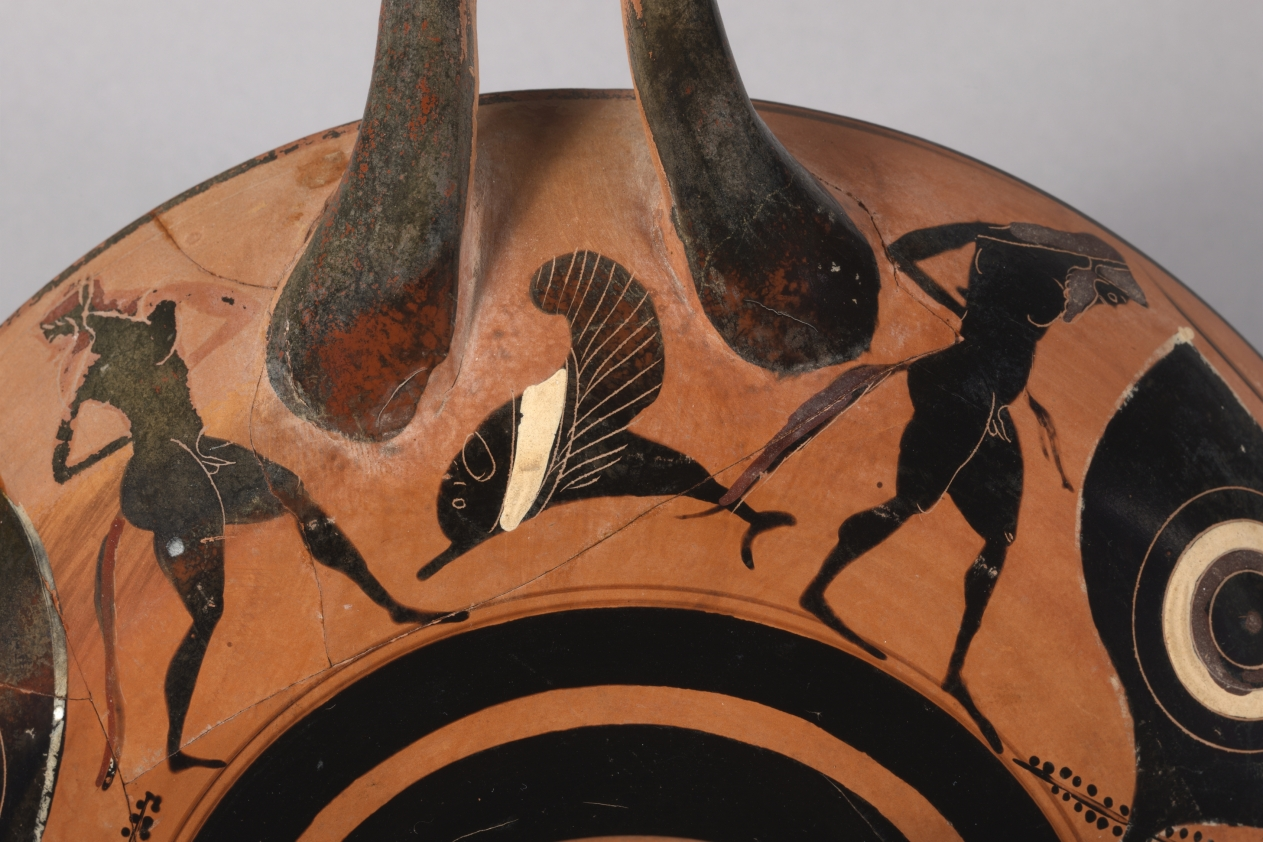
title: Black-Figure Eye Cup: Iris and Satyrs (A, B); Gorgoneion (I)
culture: Greek, Attic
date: c. 520–510 BCE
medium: ceramic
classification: Ceramic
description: Along with two large sets of eyes on its exterior, this drinking vessel also features other figures: a winged female, probably Iris, between each pair of eyes, and pairs of satyrs flanking them; a winged dolphin beneath each handle; and a frontal Gorgoneion, or face of Medusa, baring her teeth and tongue within the tondo. Although the eyes and Gorgoneion may serve to ward off evil, they also make for fluid identities while drinking, inviting drinkers to enter the mythical realm. For when tilting such cups to imbibe, drinkers confront monstrous beings while simultaneously masking their faces from others.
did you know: The eye cup takes its name from the large eyes on its exterior.